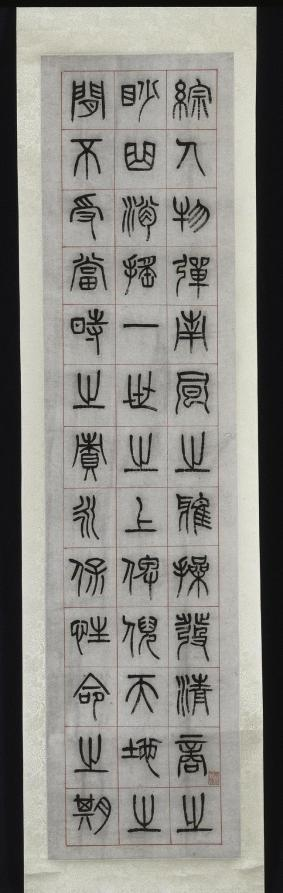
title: On Happiness, Calligraphy in Seal Script Style (zhuanshu)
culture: China, Changsu, Qing dynasty (1644-1911)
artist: Yang Yisun (Chinese, 1813–1881)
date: 1871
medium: hanging scroll, ink on paper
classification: Painting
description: Yang Yisun transcribed this ancient text on six narrow scrolls, starting at the top right and ending at the bottom left. Yang emphasizes the text’s historic nature by using the seal script style found on stone steles and bronze vessels. On Happiness features reflections of a scholar on a leisurely life in the countryside, composed by Han dynasty official Zhongchang Tong, who died the year the Han dynasty collapsed (AD 220). The idyllic life described in the text may bean evocation of the past in a time of national crisis. A decade before Yang wrote these scrolls, Anglo-French forces had looted and burned the Summer Palace in Beijing. At the same time, the domestic Taiping rebellion (1850–64), led by a religious fanatic to overthrow the Qing government, had devastated Yang’s homeland, the Jiangnan region, with an estimated 20 million lives lost.